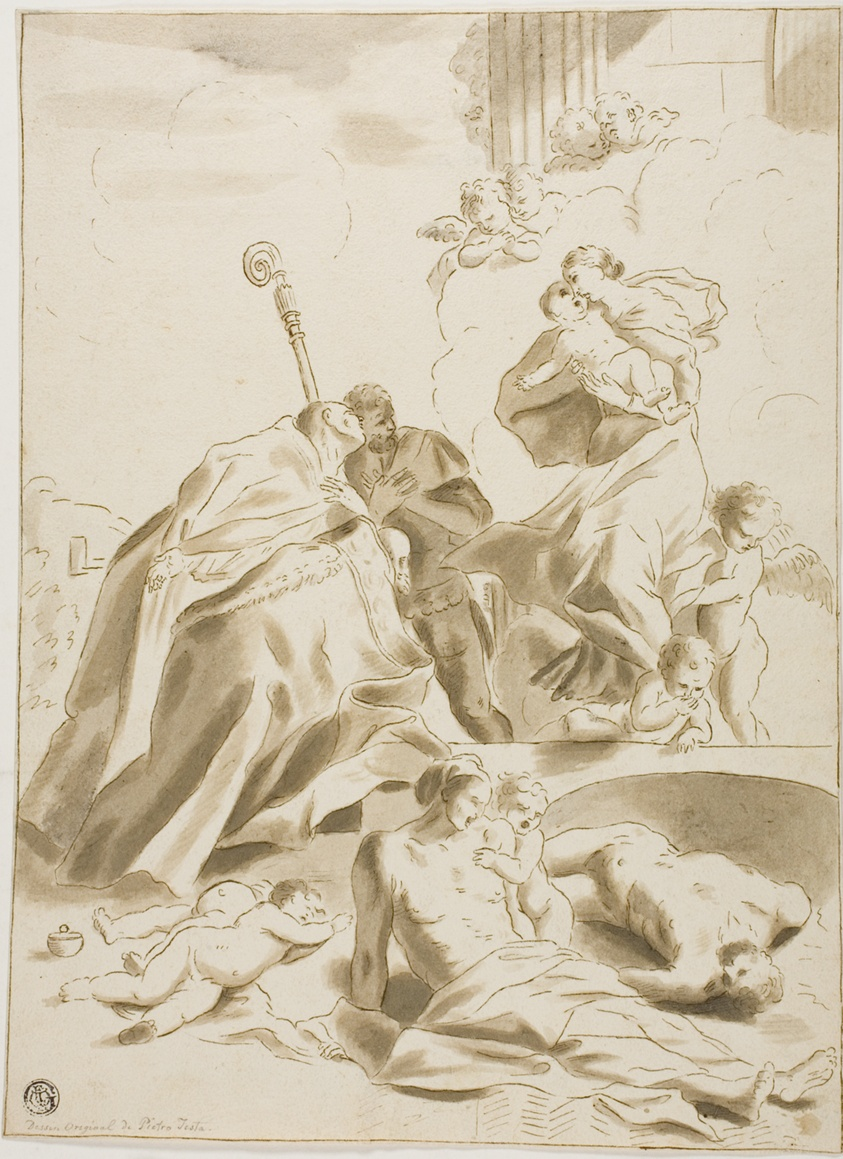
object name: Drawing and Watercolor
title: Damnation of Heresy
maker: After Pietro Testa; Italian, 1611/12-1650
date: 1630/31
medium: Pen and brown ink and brush and brown wash with traces of black chalk, on ivory laid paper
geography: Italy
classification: pen and ink drawings; drawings (visual works); prints and drawing